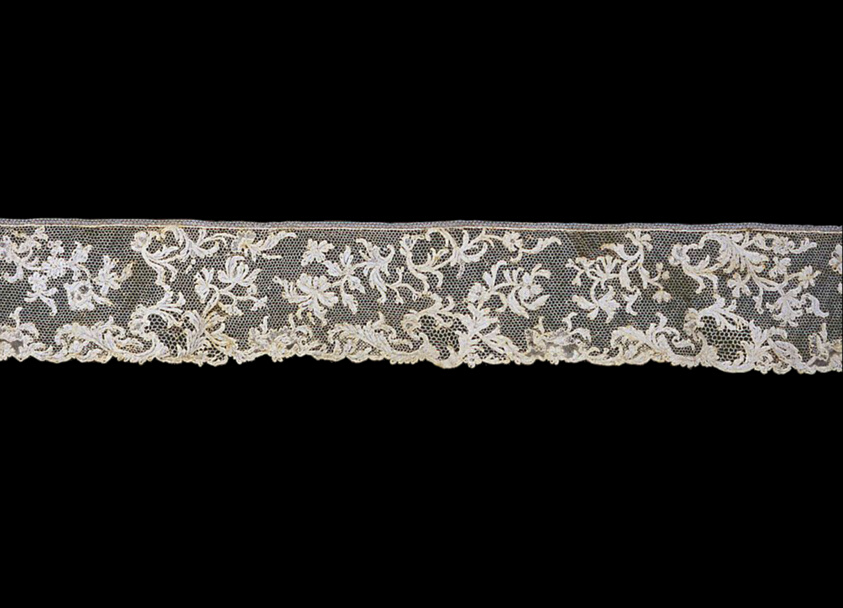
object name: Textile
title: Flounce (Used as Quilling)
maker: Italy, Burano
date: 1760s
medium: Linen, needle lace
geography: Italy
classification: textile; lace - needle